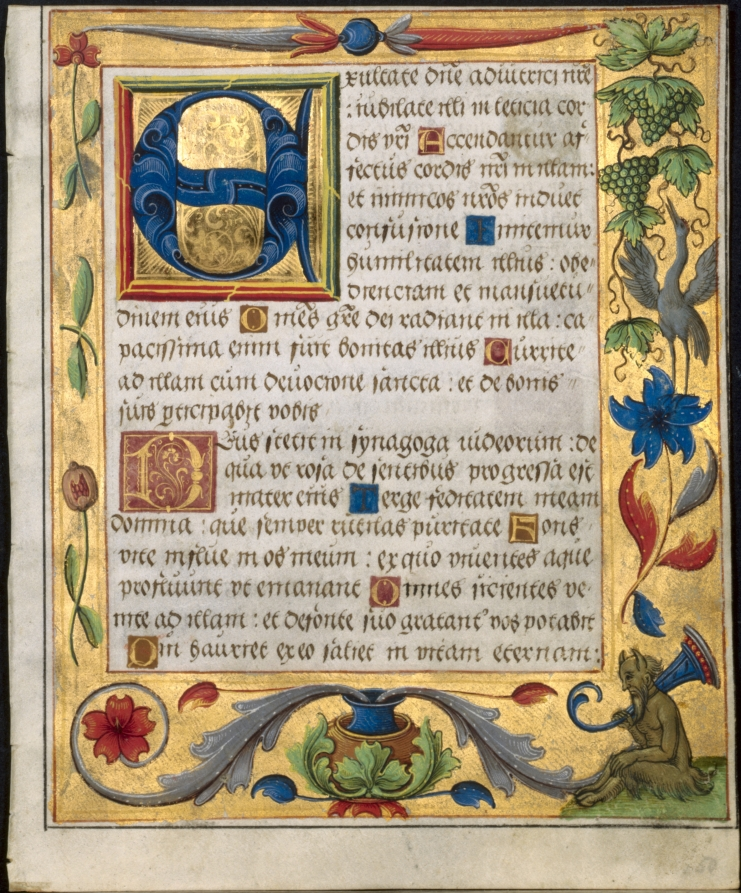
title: Leaf from a Psalter and Prayerbook: Initial E with Ornamental Border Containing a Seated Satyr and a Bird Eating Grapes (recto)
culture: North Germany, Hildesheim (?), 16th century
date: c. 1524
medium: ink, tempera and liquid gold on vellum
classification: Manuscript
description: This leaf and the one nearby were excised from the same prayer book that contained ornamental borders on nearly every page. They represent the intricate decoration found throughout the parent volume, its leaves now dispersed. Virtually every border, recto and verso, or front and back, was decorated with liquid gold and highlighted with a variety of flowers, fruits, vegetables, and animals; here a bird eats grapes while seated below is a satyr, or half goat and half man.